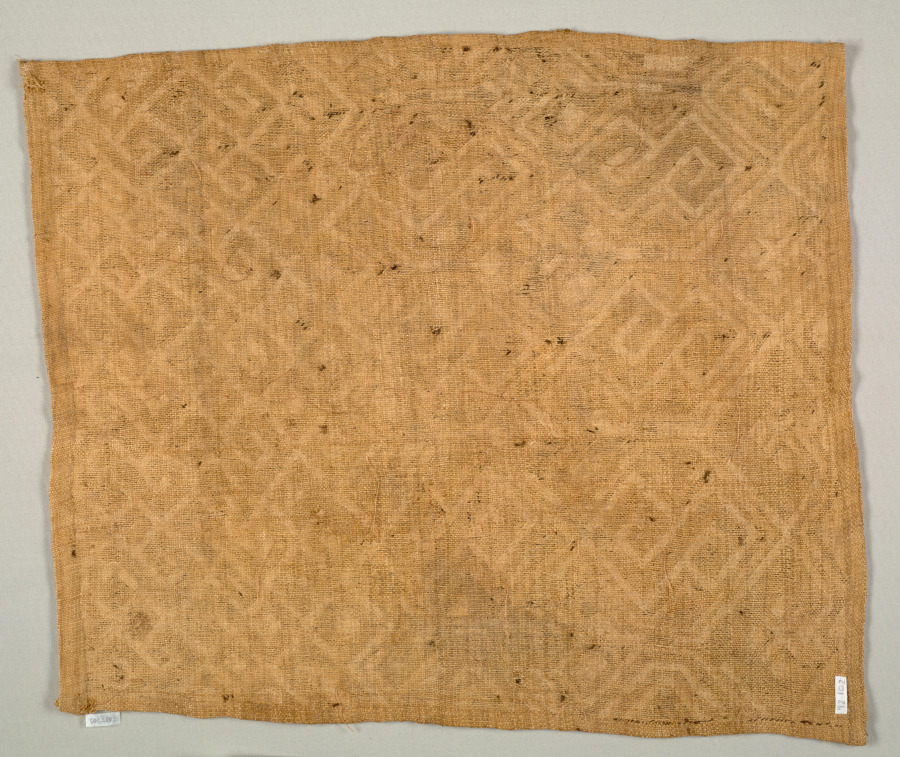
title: Embroidered Raffia Pile Cloth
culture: Africa, Central Africa, Democratic Republic of Congo, Kuba peoples, 20th century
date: 1900s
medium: Raffia and dye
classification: Embroidery